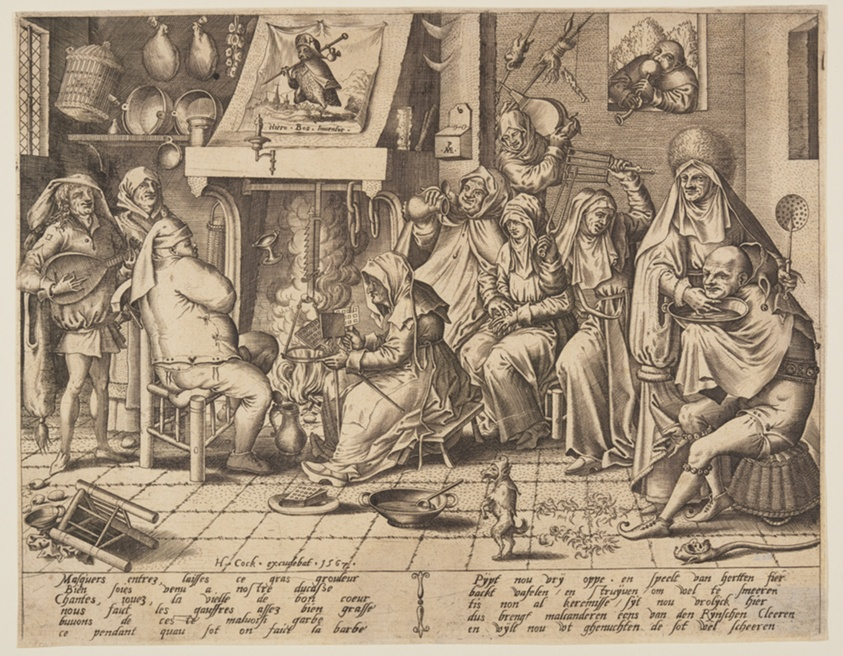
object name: Print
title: Shrove Tuesday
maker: Pieter van der Heyden (Flemish, c. 1530–after 1572); after Hieronymus Bosch (Netherlandish, c. 1450–1516)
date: 1567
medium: Engraving on ivory laid paper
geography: Flanders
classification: print; paper; prints and drawing; engraving